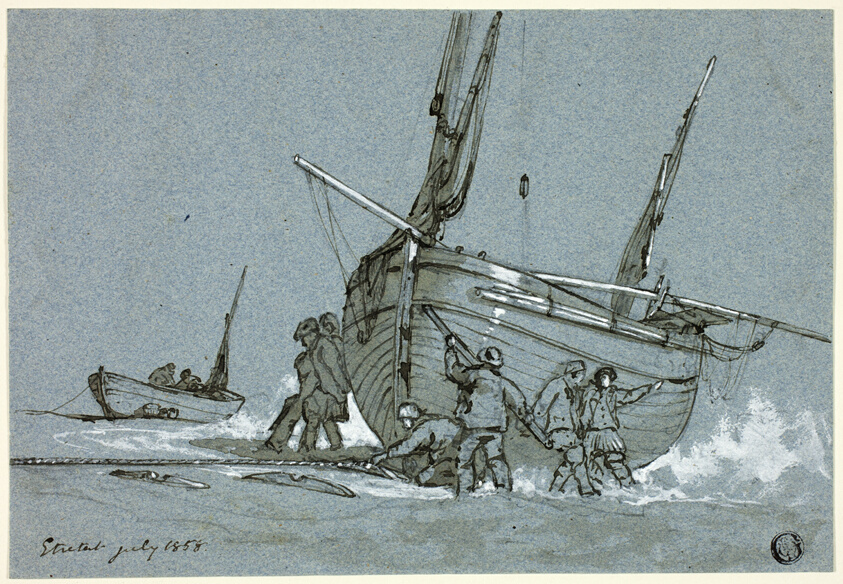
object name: Drawing and Watercolor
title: Entretat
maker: Attributed to Clarkson Stanfield; English, 1793-1867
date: July, 1858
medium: Pen and brown ink, with brush and brown wash and white gouache, over traces of graphite, on blue wove paper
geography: England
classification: pen and ink drawings; drawings (visual works); prints and drawing